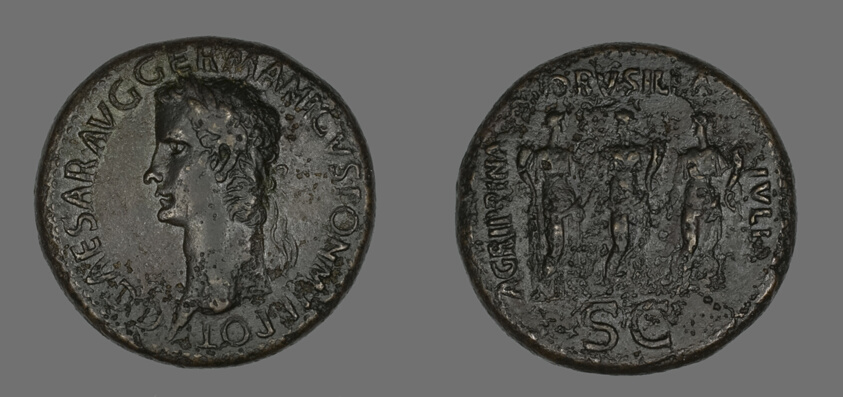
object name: Coin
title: Sestertius (Coin) Portraying Caligula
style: roman (ancient, style or period)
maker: Roman, minted in Rome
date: 37-38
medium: Bronze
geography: Roman Empire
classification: coin; ancient art